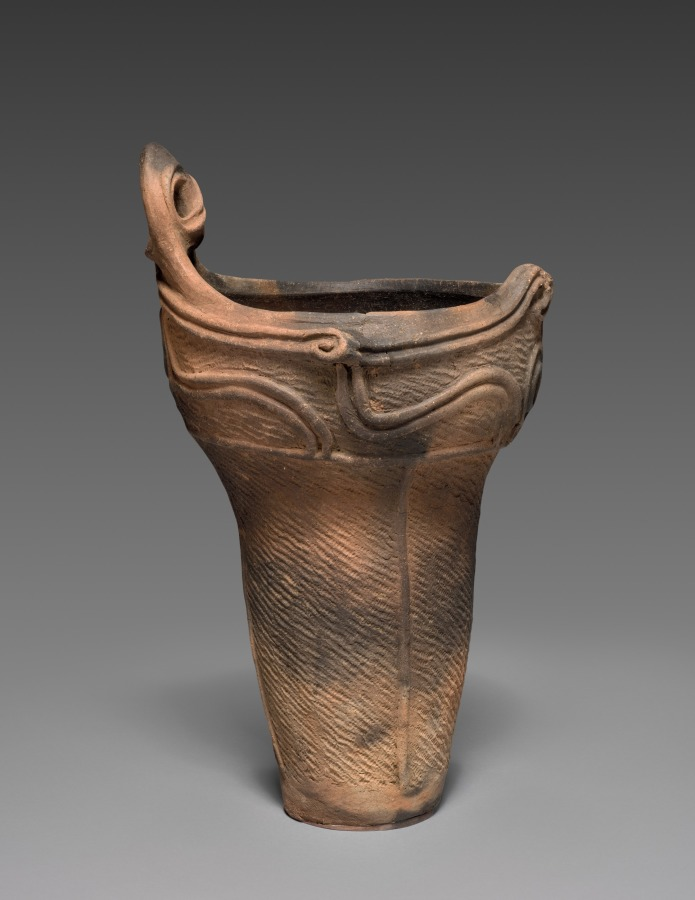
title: Cooking Vessel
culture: Japan, Jōmon period (c. 10,500–300 BCE)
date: c. 2500 BCE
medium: earthenware with impressed and applied designs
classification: Ceramic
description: This asymmetrical vessel has designs made by pressing cord or rope onto the damp clay and cylinders of clay applied to the surface. Based on its designs and shape, it was likely produced in the northern Kanto region. For reasons unknown today, different regions created signature styles.